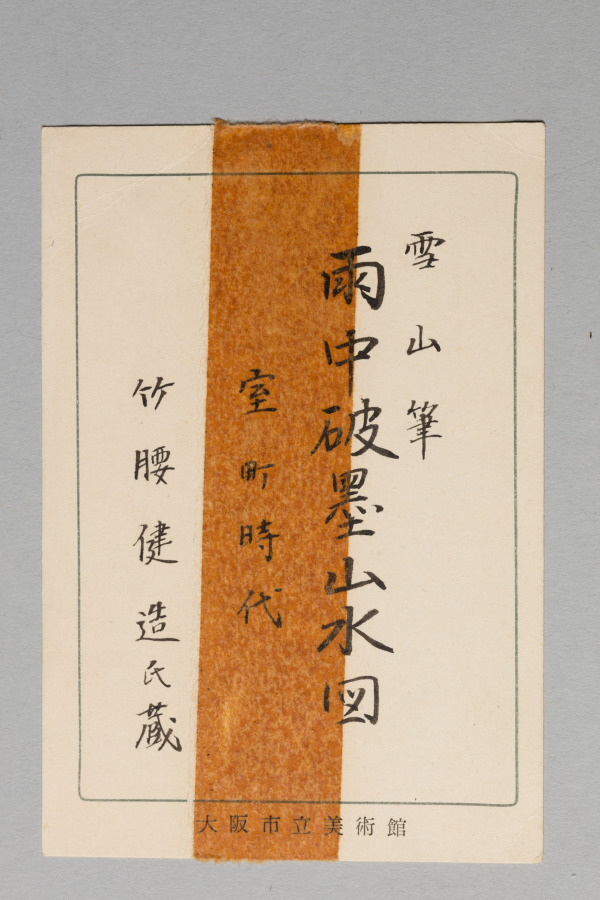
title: Mountain and River in Storm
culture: Japan, Edo period (1615–1868)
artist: Hirowatari Setsuzan (Japanese, ?-1674)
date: early to mid-1600s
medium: hanging scroll; ink on paper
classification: Painting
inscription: signed: Setsuzan hitsu